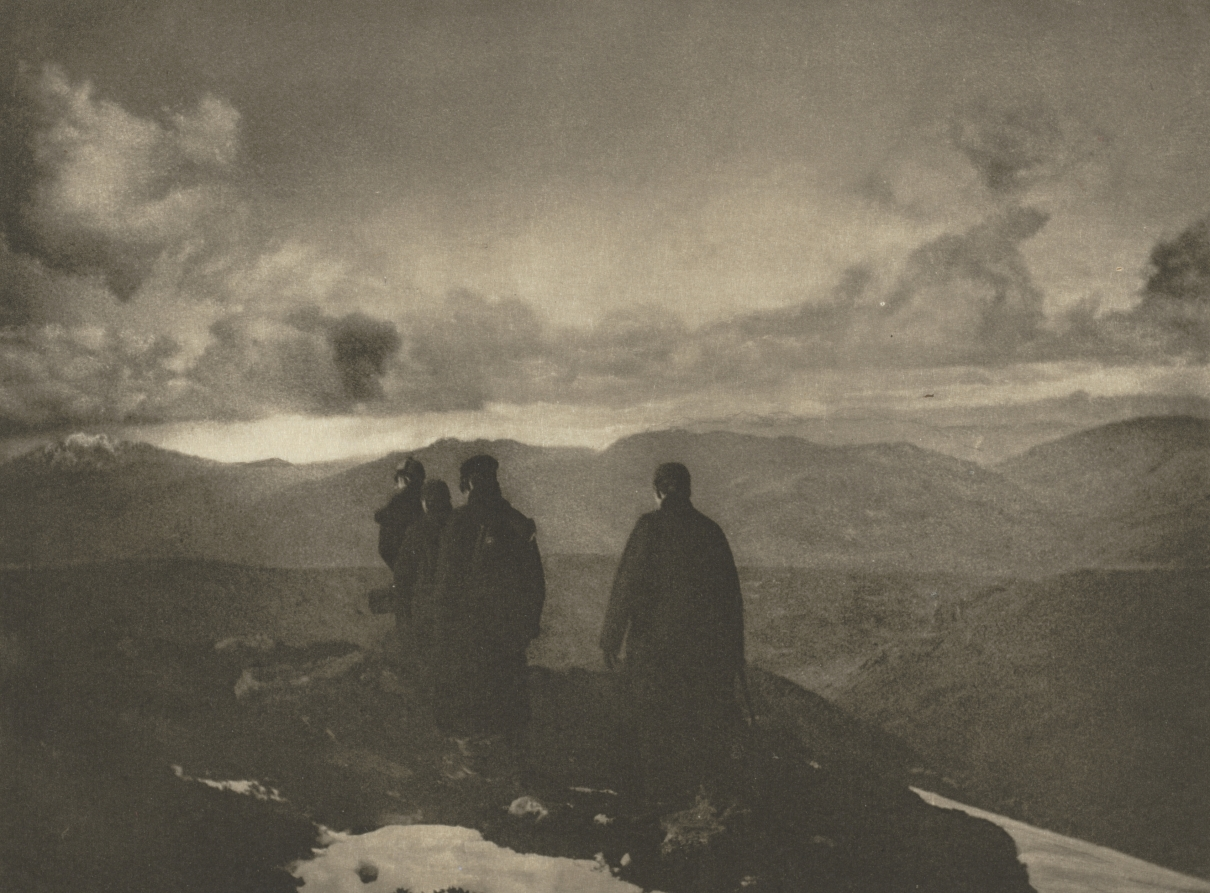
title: Camera Work: The Dark Mountains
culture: England, 20th century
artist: J. Craig Annan (British, 1864–1946)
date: 1904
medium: photogravure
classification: Bound Volume